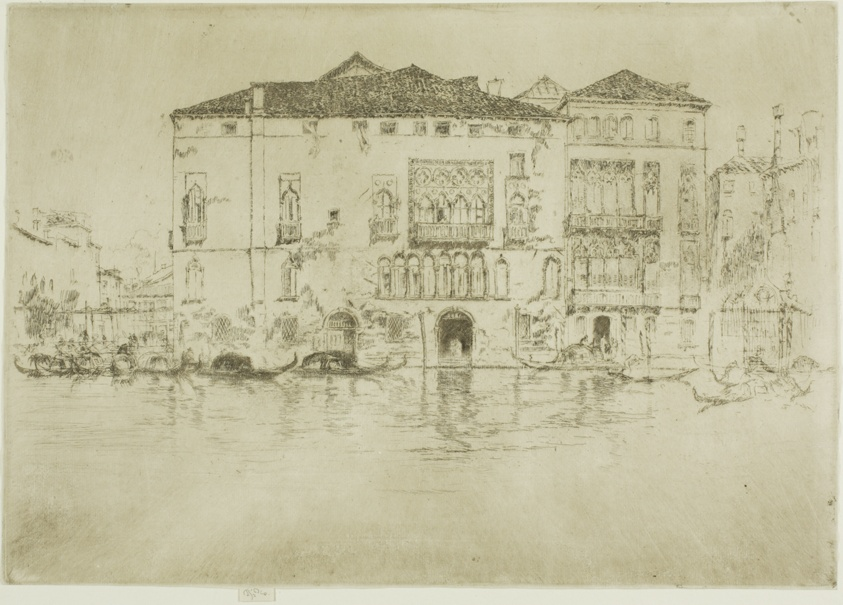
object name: Print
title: The Palaces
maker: James McNeill Whistler (American, 1834-1903)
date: 1879/80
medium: Etching, drypoint and open bite in dark brown ink on ivory laid paper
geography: United States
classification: etching; drypoint; print; prints and drawing; open bite; paper